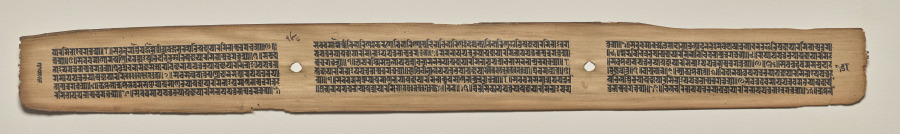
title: Text, folio 168 (verso), from a Manuscript of the Perfection of Wisdom in Eight Thousand Lines (Ashtasahasrika Prajnaparamita-sutra)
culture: Eastern India, Bihar, Vikramashila Monastery. Painting: Nepal, Kathmandu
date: Sunday, September 14, 1119 (year 239 of the Newar Samvat in the month of Ashvina)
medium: gum tempera and ink on palm leaves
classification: Painting